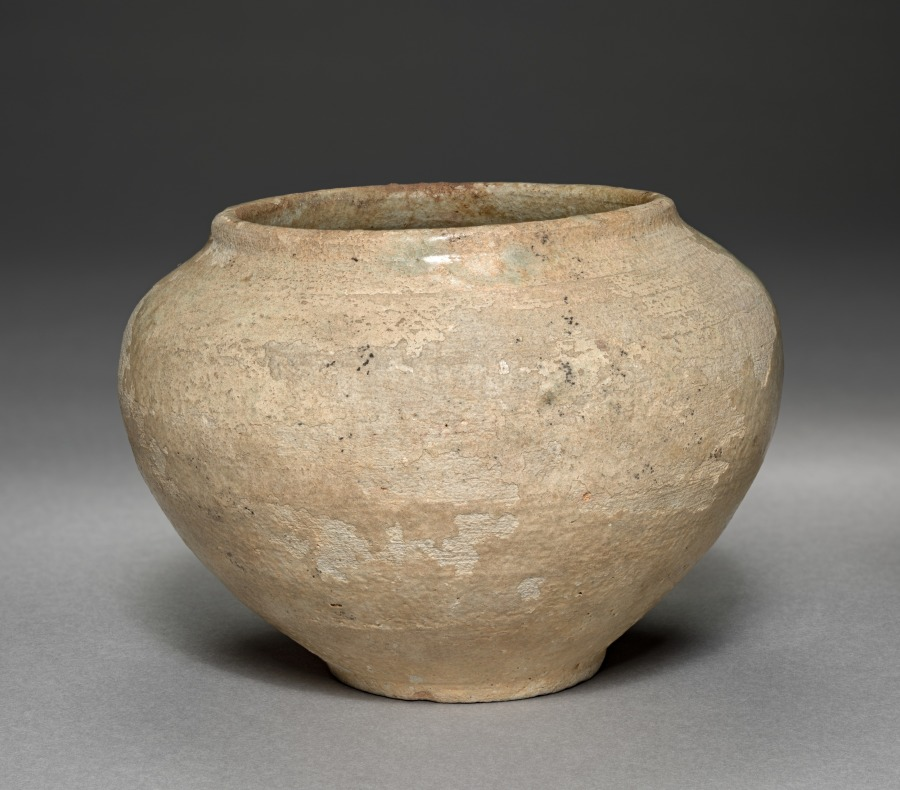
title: Jar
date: 1100s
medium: Pottery, glazed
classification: Ceramic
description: This jar is one of the rare porcelain examples from the Goryeo period (918–1392). In Korea at that time, both celadons and porcelains were produced in the same kilns, explaining why this porcelain jar bears a greenish blue glaze.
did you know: This jar is one of the rare porcelain examples from the Goryeo period (918–1392).